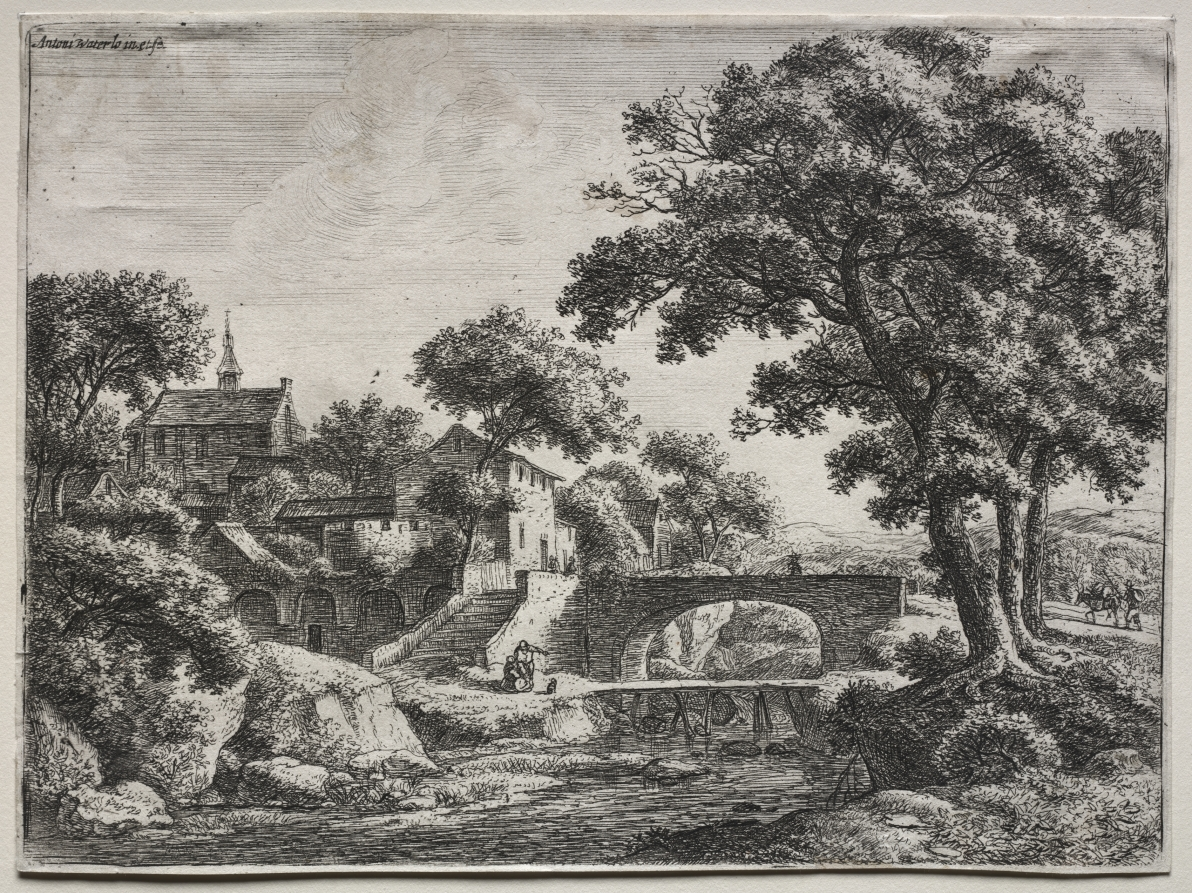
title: Twelve landscapes (H.95-106): The Two Bridges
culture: Netherlands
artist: Anthonie Waterloo (Dutch, 1609/10–1690)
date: 1640–90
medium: etching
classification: Print